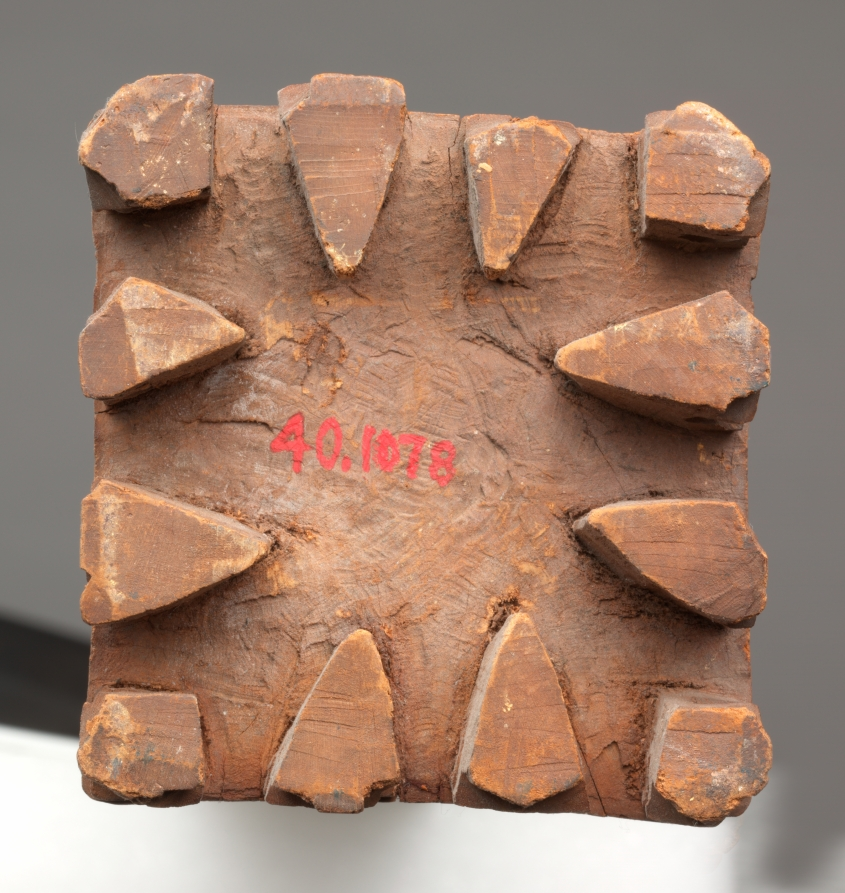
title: Ceremonial Adze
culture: Polynesia, Mangaia, Cook Islands, 19th century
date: 1800s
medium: wood, stone, fiber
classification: Sculpture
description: Before European contact, Polynesian carving tools were fashioned from bone, shell, stone, or teeth. The introduction of iron tools facilitated carving, while the demand of European sailors and missionaries for souvenirs provided a new market for craft products. Ceremonial adzes probably represented gods or spirits. The wooden handle of this example is carved with the characteristic K motif. The stone adze blade is lashed to the handle with finely plaited sennit fiber cord. According to legend, the distinctive pattern formed by the sennit lashing was taught to Mangaian craftsman by the gods.